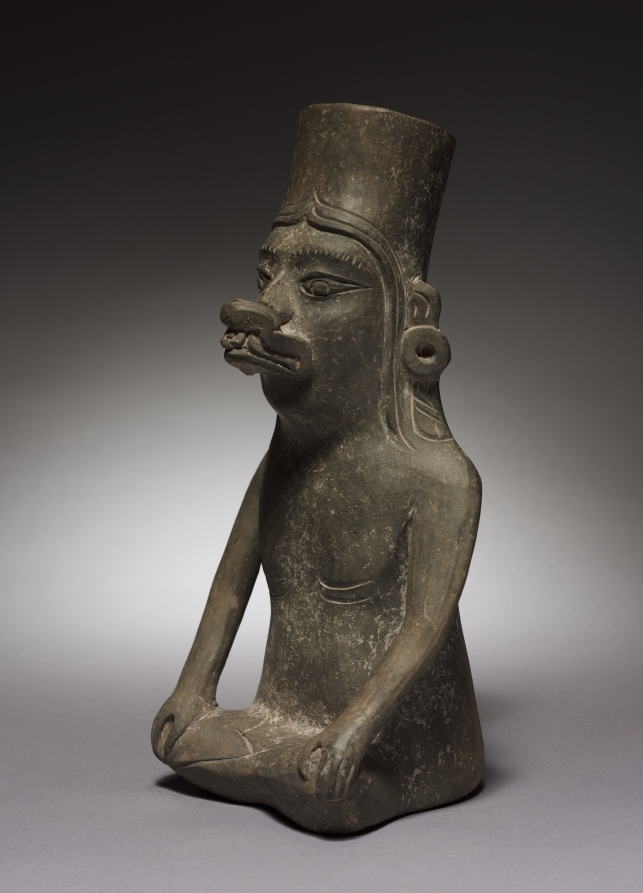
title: Urn Figure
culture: Mexico, Oaxaca, Zapotec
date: c. 150 BCE–200 CE (thermoluminescence date, 60 BCE–642 CE)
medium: earthenware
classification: Sculpture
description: This simply posed and costumed urn figure represents a goddess, or perhaps an ancestress. Early Zapotec ceramic art has a spare elegance that contrasts strongly with the florid ornamentation of later works.